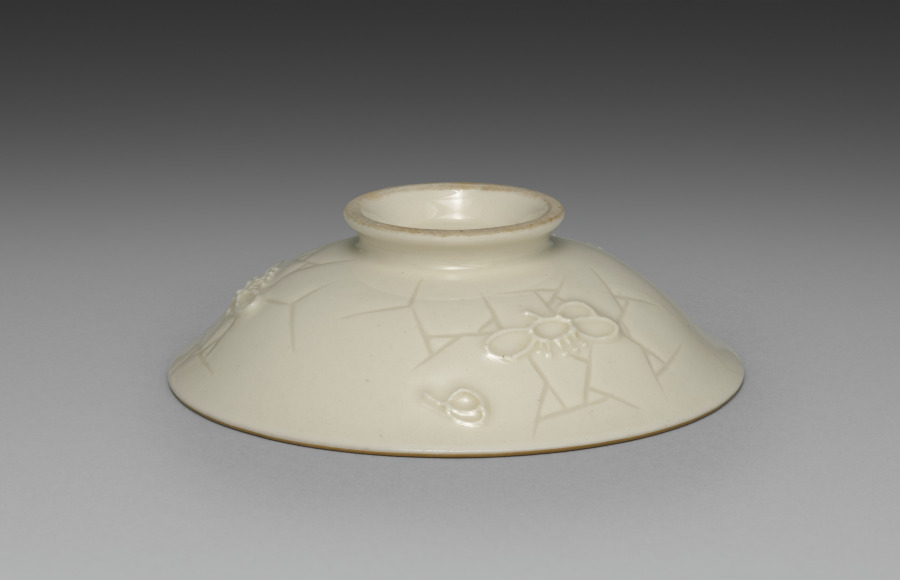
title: Cover for a Bowl from Dining Set with Plum Blossoms and Cracked-Ice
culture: Japan, Meiji period (1868–1912)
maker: Seifū Yohei II (Japanese, 1844–1878)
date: c. 1875–78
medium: Porcelain with molded designs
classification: Ceramic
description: Each item in this set has a delicate low-relief design of flowering plum branches over scattered, intersecting lines meant to resemble the cracked-ice surface of a frozen body of water and is signed on the base in gold pigment. While Yohei II produced many fine works in underglaze blue, like those produced by Kiyomizu Shichibei, he also made works in quite different styles later in his career, from the early 1870 s. In 1873, he was appointed purveyor to the Industrial Center of Kyoto Prefecture, a designation associated with Kyoto’s efforts to reach an international market through the port of Kobe; and from 1875 until his death, he was involved in national-level projects to present Japanese ceramics across the world. It was during this period that Yohei III was apprenticed to Yohei II, and it has been suggested that this set may in fact be an early example of Yohei III’s work, which he signed with his teacher’s name. Decorated with flowers resembling Japanese textile motifs, the set calls to mind the design of Yohei II’s pair of vases with plum blossoms in the Victoria and Albert Museum. Here, the elaborate trees created for a formal public exhibition setting have been translated into the approachable blossoms of the genteel domestic environment. While the designs are consistent across the pieces, each raised flower petal and pistil and each incised line in the ice was done by hand, so the cups, bowls, and dishes are similar yet unique. The bottoms of two boxes once identified the set’s owner, but the information has been deliberately obscured with black ink. However, inscriptions still visible appear to indicate two occasions, once at the end of July 1886 , and once again in June 1916 , when parts of the set were requested from Hokura in Niigata Prefecture. The location corresponds to a neighborhood in the present-day city of Jōetsu. The surname Tsuji 辻 also appears on a paper tag affixed to one of the box cloths. Future research may possibly reveal more about their provenance. A vase by Yohei III in a private collection combines the formal grandeur of the Yohei II vases in the Victoria and Albert Museum with the gentler design of this dining set, placing flowering plum trees against soft, scalloped-edge clouds resembling those in golden screens.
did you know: The dining wares have a creamy white coloration that the four boxes containing them identify as Korean in style.